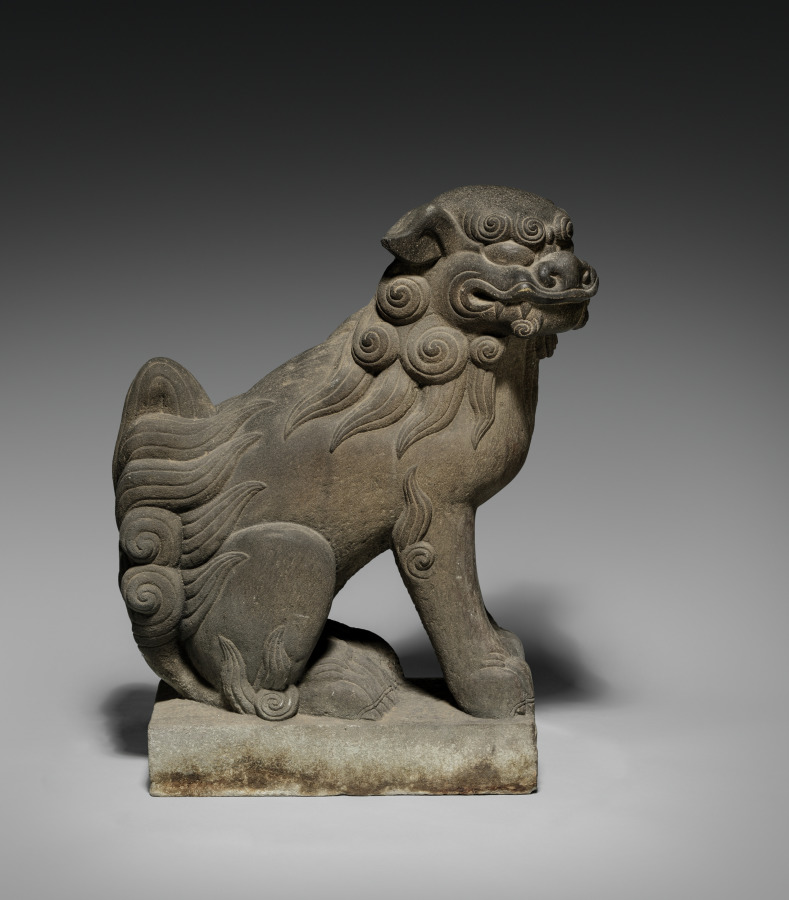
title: Lion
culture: Japan?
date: c. 1800s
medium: gray schist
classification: Sculpture